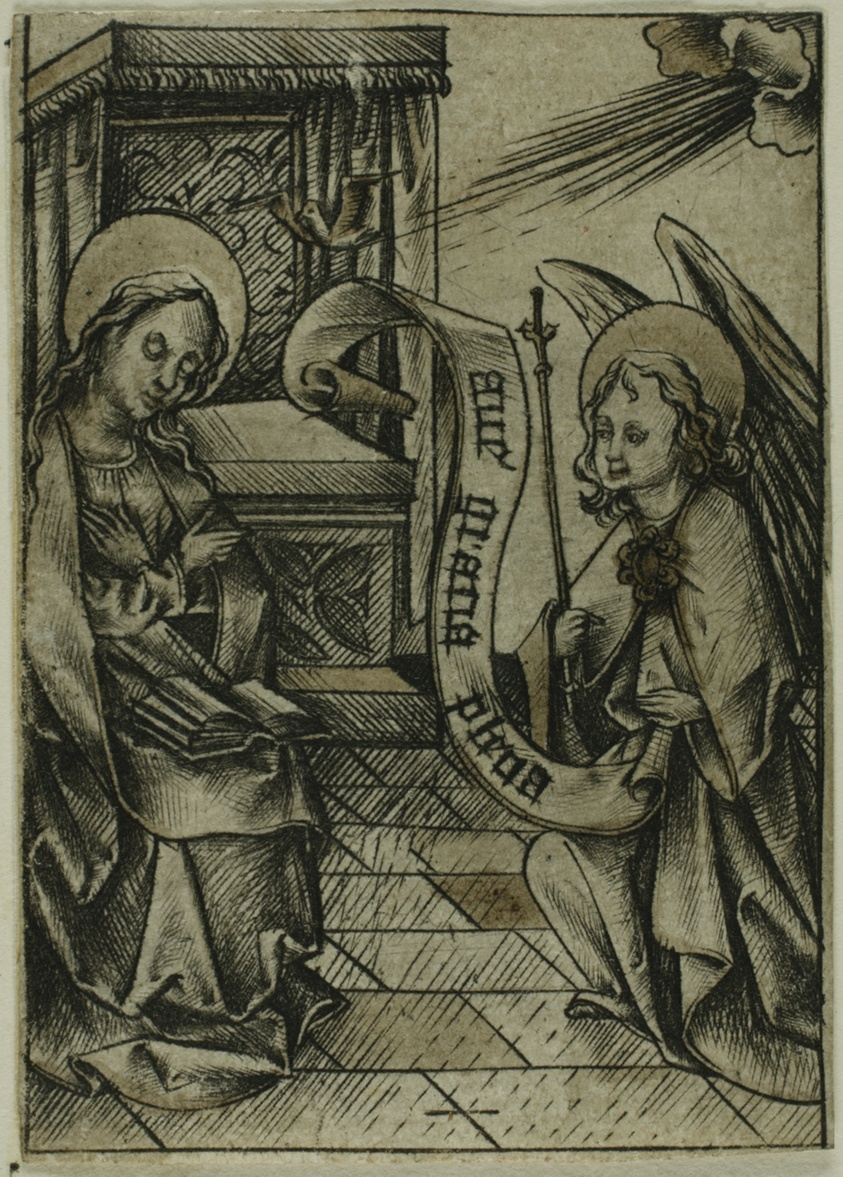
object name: Print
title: The Annunciation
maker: Israhel van Meckenem the Younger; German, c. 1440/45-1503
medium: Engraving in black on ivory laid paper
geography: Germany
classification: engraving; print; prints and drawing